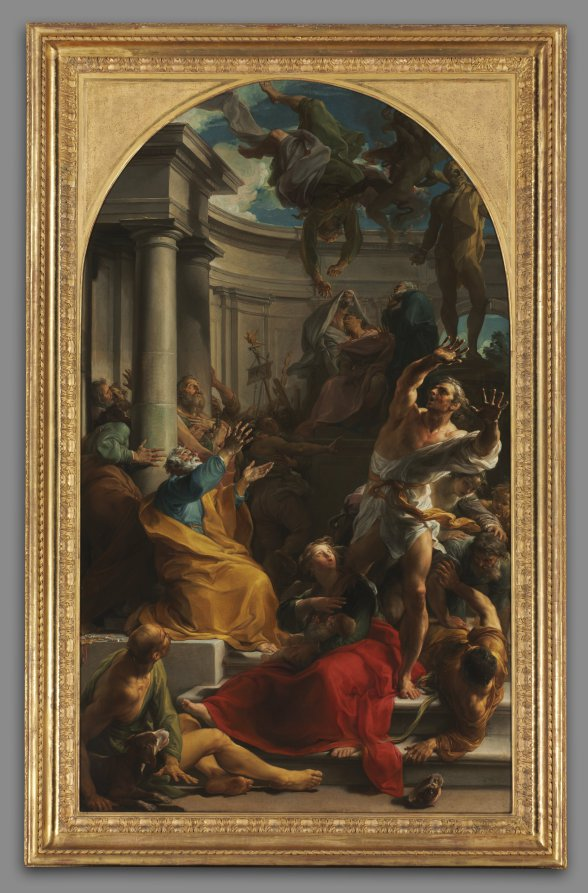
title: The Fall of Simon Magus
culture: Italy, 18th century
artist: studio of Pompeo Batoni (Italian, 1708–1787)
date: c. 1745–50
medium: oil on canvas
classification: Painting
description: Saints Peter and Paul came to Rome to win converts to Christianity soon after Christ’s death, while Simon Magus, claiming to be the son of God, attempted to prove his divinity by flying. Due to Saint Peter’s prayers, the demons supporting Simon abandoned him and he plummeted to his death. This work is probably a studio copy after a lost oil sketch for a huge altarpiece commissioned in 1746 for Saint Peter’s Basilica at the Vatican. Because of the humidity in Saint Peter’s, which quickly ruined paintings, the work was to have been translated into a massive mosaic. However, for reasons that remain unclear, Batoni’s mosaic was never created.